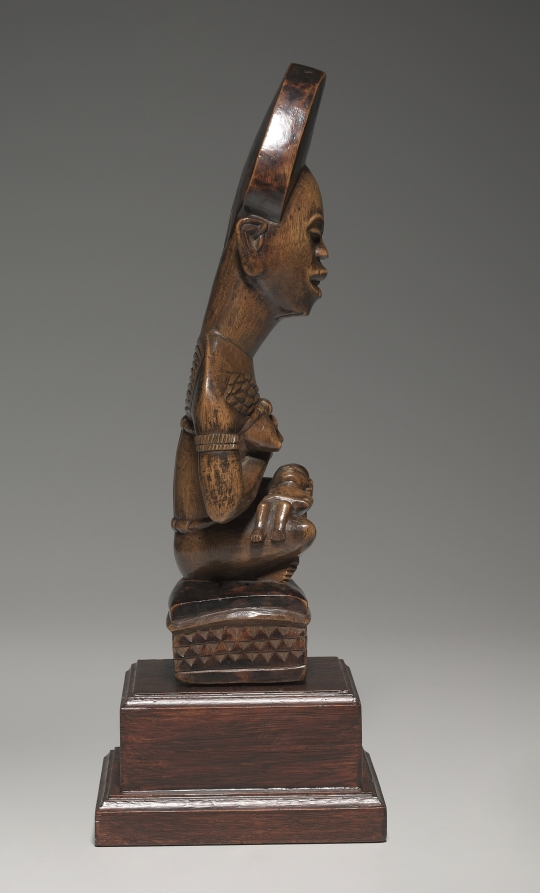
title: Woman and Child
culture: Africa, Central Africa, Democratic Republic of Congo, Yombe-style carver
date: mid- to late 1800s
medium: Wood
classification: Sculpture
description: This mother-and-child figure was probably part of a cult concerned with the treatment of infertility. Both her jewelry and her seated pose indicate that the woman occupied a high rank in her community. Her miter-shaped hairstyle, chiseled teeth, and raised body scars--considered to be marks of beauty and perfection--signal that the woman incarnates the founding ancestor of a kinship group.